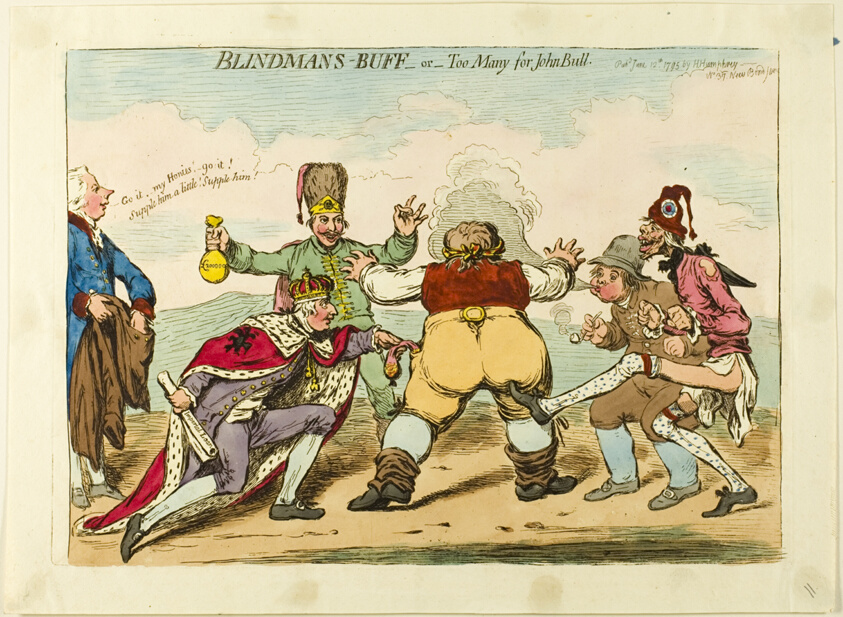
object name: Print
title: Blindman's Buff or Too Many for John Bull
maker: James Gillray (English, 1756-1815); published by Hannah Humphrey (English, c. 1745-1818)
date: published June 12, 1795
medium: Etching in dark brown, with handcoloring, on cream wove paper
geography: England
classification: etching; print; prints and drawing